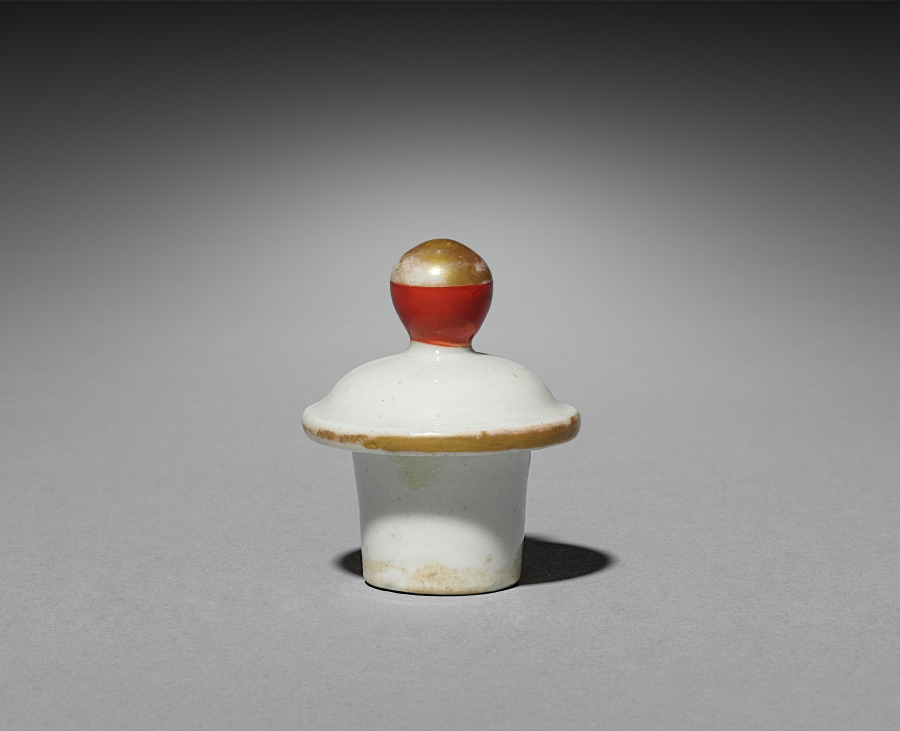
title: Sake Bottle with Three Figures (lid)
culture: Japan, Edo period (1615–1868)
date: late 1700s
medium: porcelain with overglaze enamel and gold decoration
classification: Ceramic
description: The bottle features three elegantly drawn figures: a beautiful woman, a young man, and a priest. The artist used a fine-haired brush to draw these figures in colored enamel onto the porcelain bottle, which had already been given a clear glaze. A final firing fused the enamel to the form. The name derives from the port of Imari from where Japanese porcelains were shipped to other cities in Japan, China, and Europe.